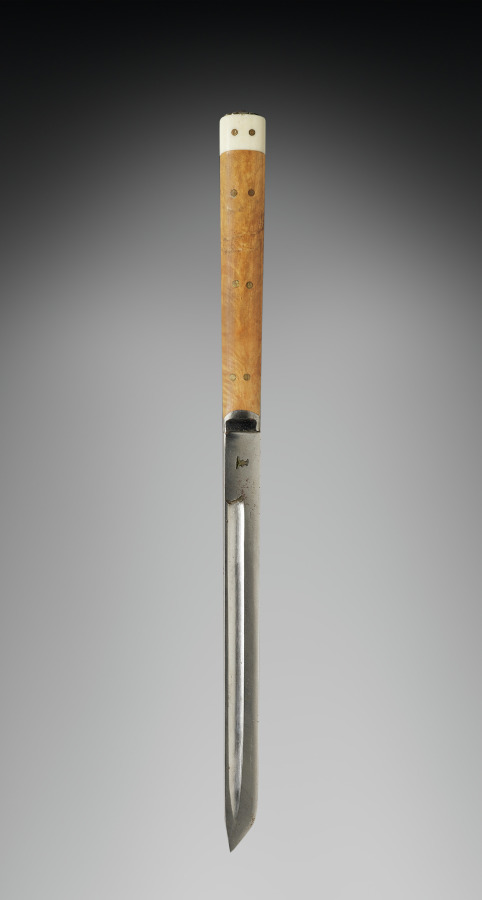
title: Knife for Chopstick and Knife Kit -Souvenir Trade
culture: Japan, Meiji period (1868–1912) to Taishō period (1912–26)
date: early 1900s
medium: enamel, wood, walrus ivory or bone, metal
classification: Implements